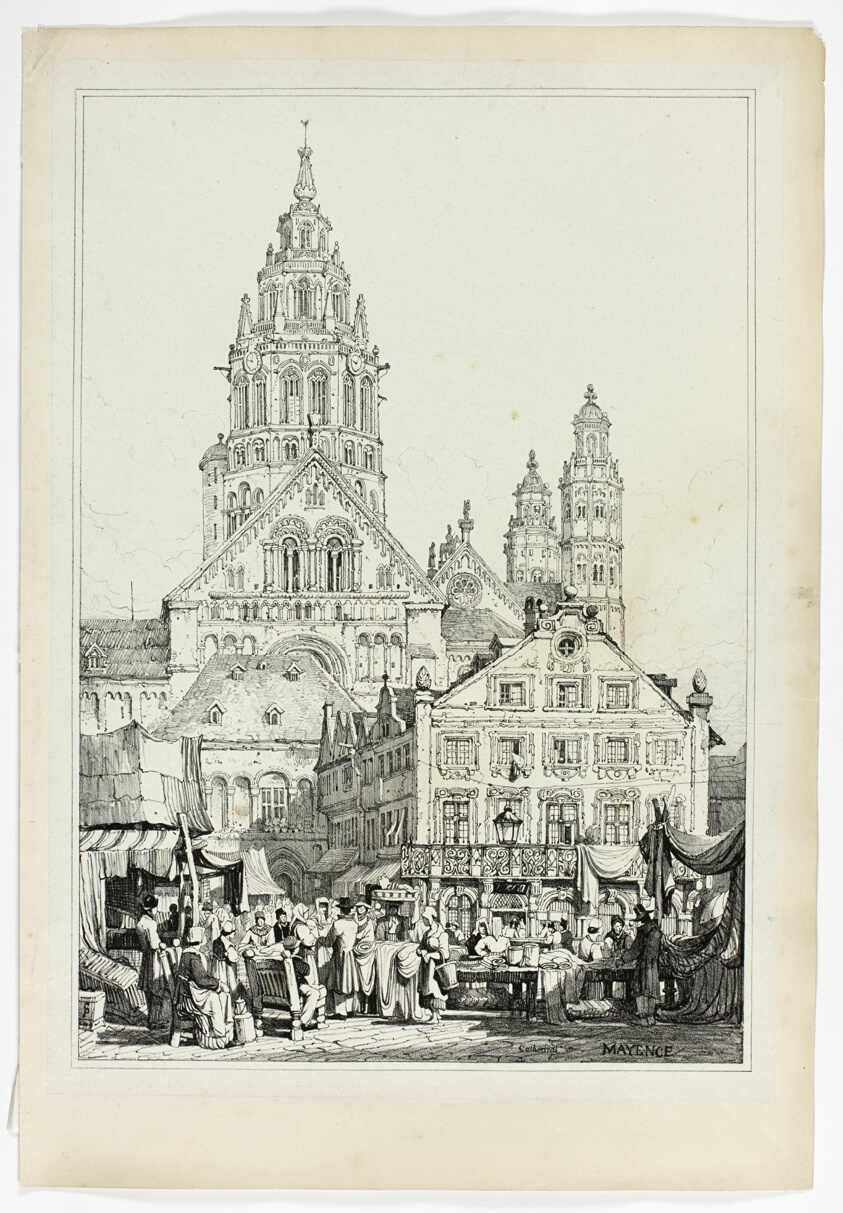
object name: Print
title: Cathedral at Mayence, from Facsimiles of Sketches made in Flanders and Germany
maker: Samuel Prout (English, 1783-1852); printed by Charles Joseph Hullmandel (English, 1789-1850)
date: 1833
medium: Lithograph in black on grayish-ivory chine, laid down on ivory wove paper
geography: England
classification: lithograph; print; prints and drawing